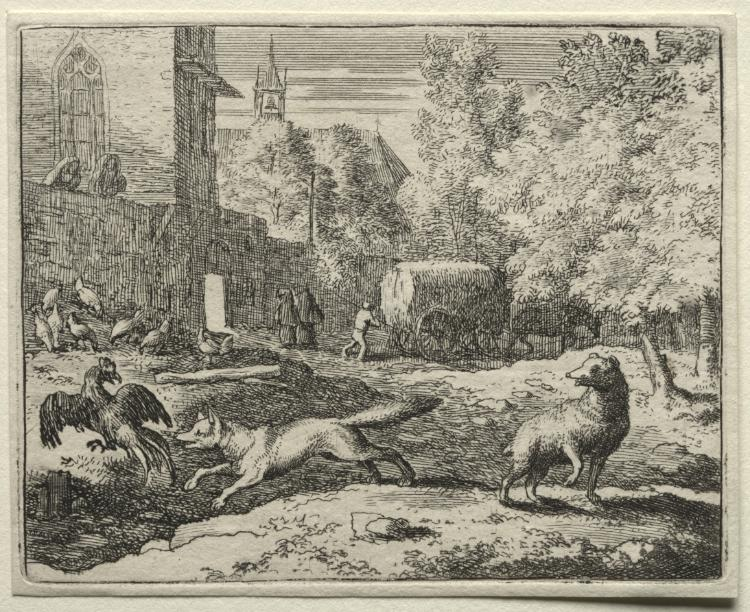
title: Reynard the Fox: Reynard Chasing Hens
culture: Netherlands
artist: Allart van Everdingen (Dutch, 1621–1675)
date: 1650–75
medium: etching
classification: Print